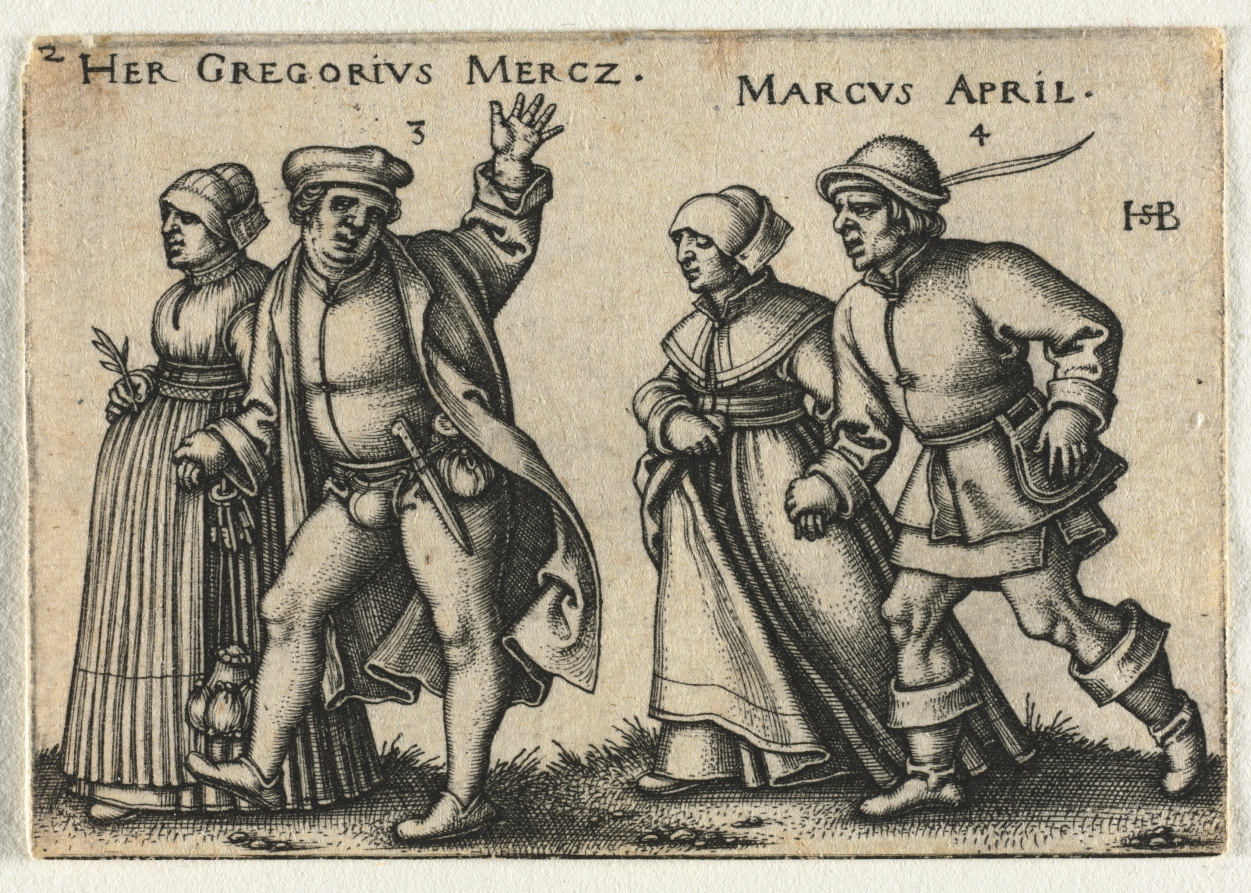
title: The Peasant Wedding or the Twelve Months: 3-Her Gregorius Mercz 4-Marcus April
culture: Germany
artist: Hans Sebald Beham (German, 1500–1550)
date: 1546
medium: engraving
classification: Print